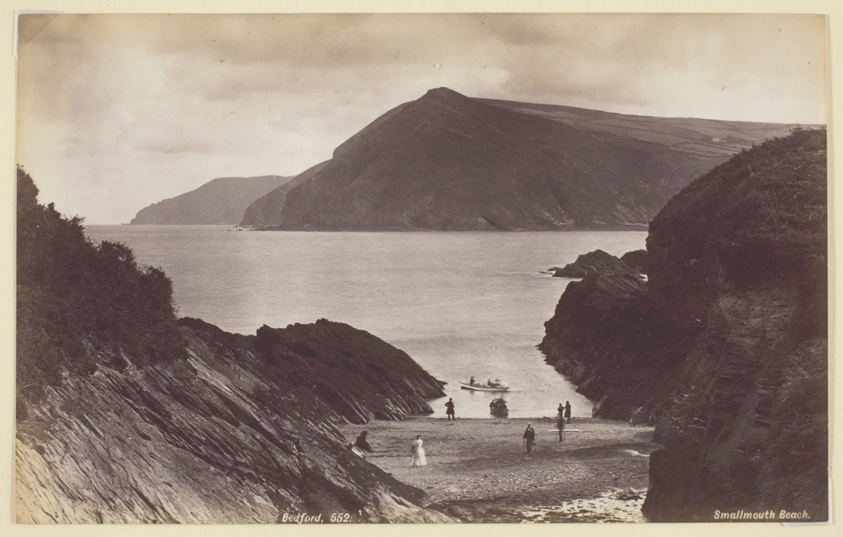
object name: Photograph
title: Smallmouth Beach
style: 19th century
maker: Francis Bedford (English, 1816–1894)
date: 1860/94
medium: Albumen print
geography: England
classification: albumen silver print; photographic process; photography; photograph